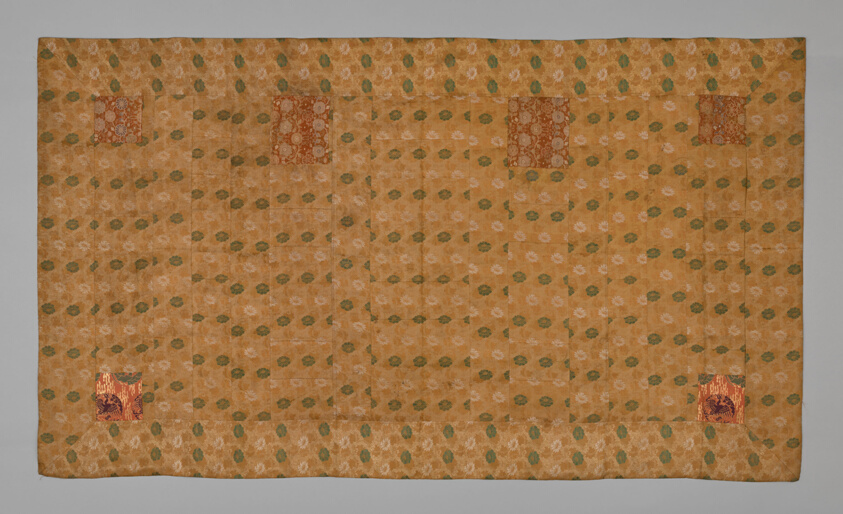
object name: Textile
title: Kesa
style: edo (japanese period), late edo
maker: Japan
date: late Edo period (1789–1868), mid–/late 19th century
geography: Japan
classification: textile; weaving; costume; liturgical - buddhist